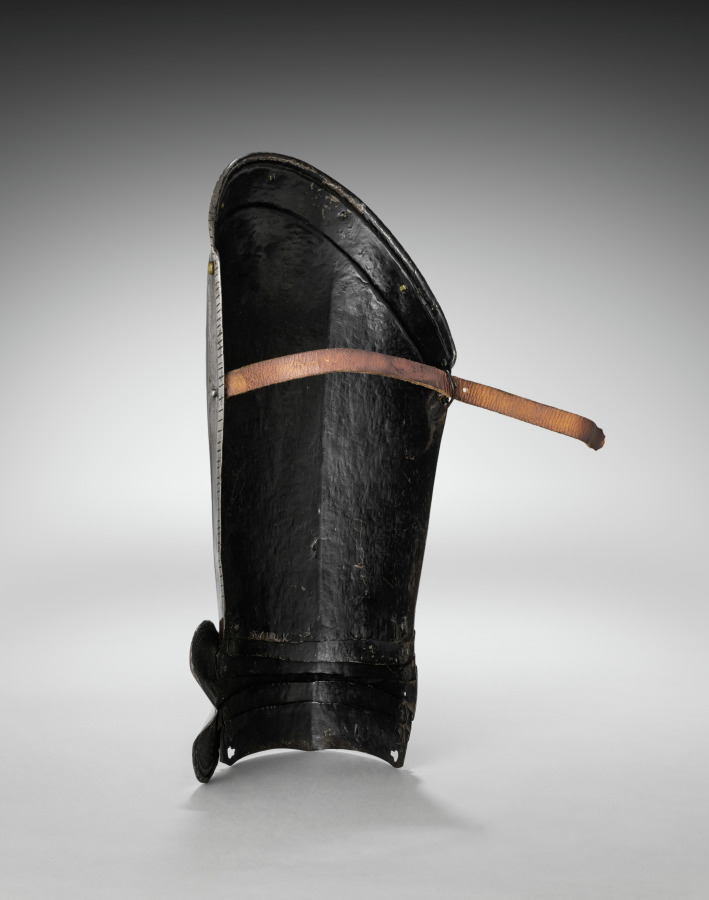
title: Proper Left Cuisse and Knee Cop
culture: South Germany, 16th century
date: c. 1560–1580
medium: steel, leather straps, brass rivets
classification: Arms and Armor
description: This armor was developed for the joust-a sporting combat between two mounted contestants. Although all of the elements of this armor date from the same period, they are not all from the same suit. This armor is thus called "composed." It also shows the asymmetry of jousting armor. The participants rode along a wall-like barrier known as a "tilt" with their left sides facing one another. Consequently, armor on that side of the body had to be thicker. Note the large plate (grandguard) over the left shoulder for extra protection. Also, the breathing holes in the helmet were placed on the right side (farthest from an opponent's lance) to avoid injuries from splinters. The bracket attached to the right breastplate is called the lance-rest, a shock-absorbing support designed to accommodate the lance when "couched" under the right armpit.